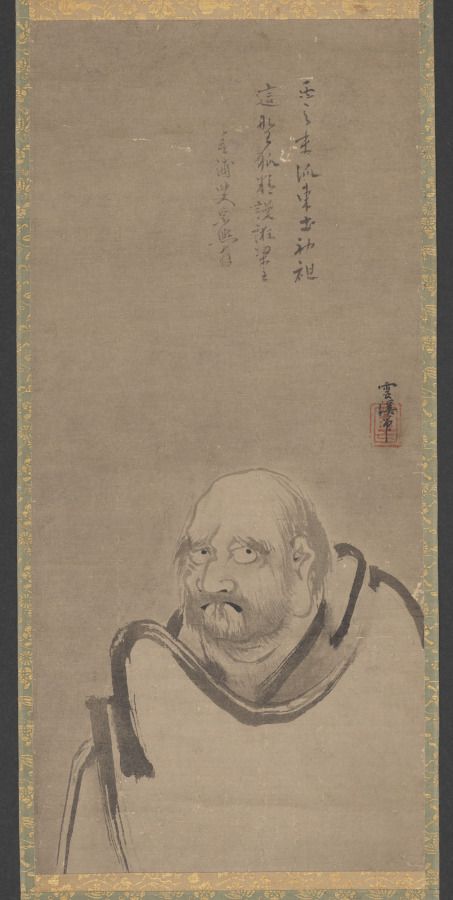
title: Bodhidharma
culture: Japan, Muromachi period (1392–1573)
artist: Unkei Eii (Japanese, active 1504–1520)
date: early 1500s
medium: hanging scroll; ink on paper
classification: Painting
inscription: signed: "Unkei" two-line inscription signed: Shunpō Sōki (1416-1496), 40th abbot of Daitokuji temple